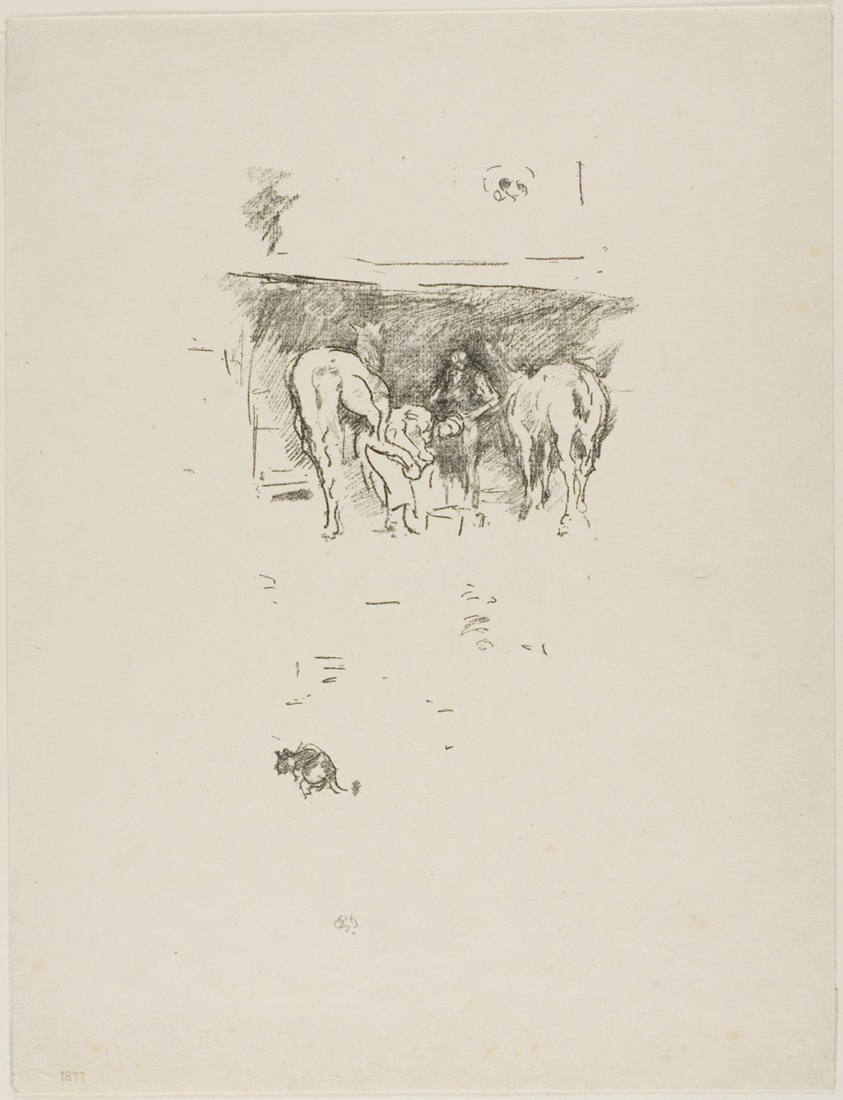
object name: Print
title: The Good Shoe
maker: James McNeill Whistler (American, 1834-1903)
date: 1895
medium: Transfer lithograph in black on cream Japanese paper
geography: United States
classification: transfer lithograph; lithograph; print; prints and drawing; paper